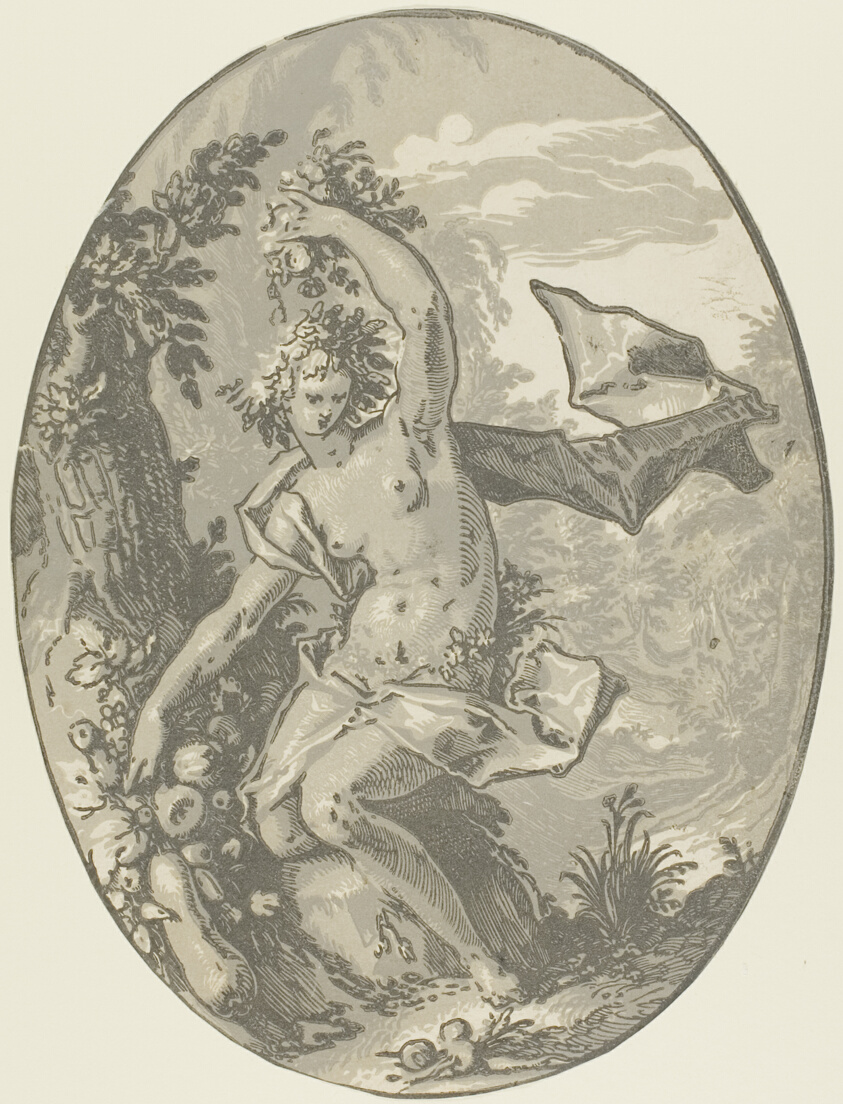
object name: Print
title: Proserpine, plate five from Demogorgon and the Deities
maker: Hendrick Goltzius (Dutch, 1558-1617)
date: c. 1588–90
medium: Chiaroscuro woodcut in black and two shades of gray on paper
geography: Netherlands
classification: woodcut; print; prints and drawing